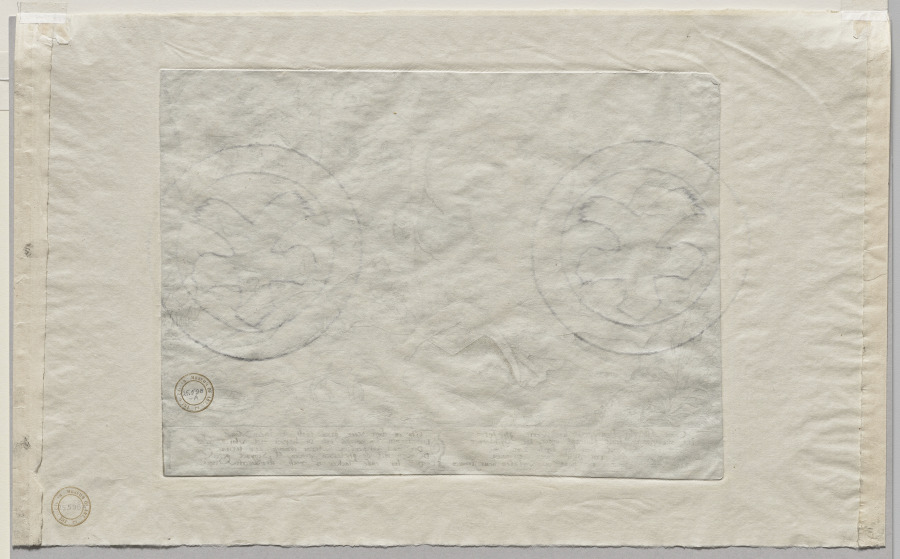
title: Gluttony (Land of Cockaigne)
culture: Flanders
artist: Peeter Baltens (Flemish, 1526/28–before 1584)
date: 1560s (later restrike)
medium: engraving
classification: Print